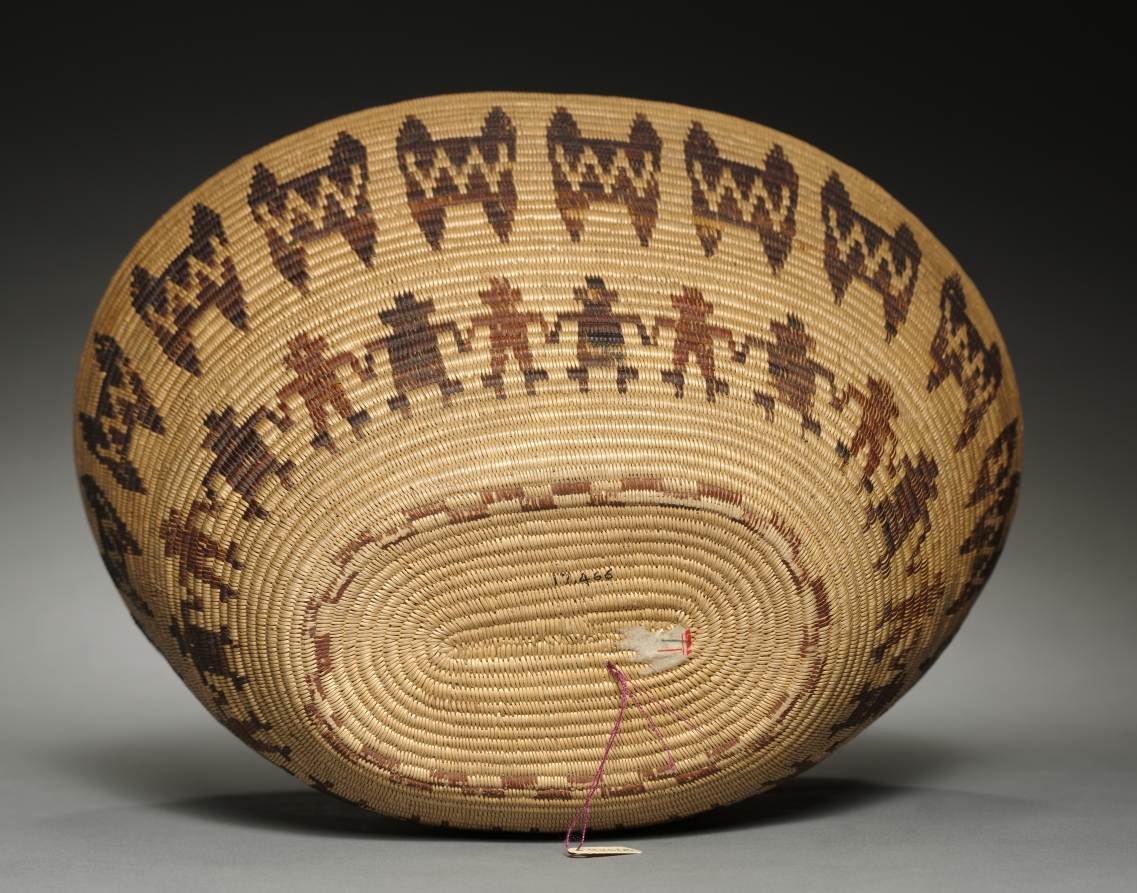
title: Jar-shaped Basket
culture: Native North America, Great Basin, California, Death Valley, Timbisha (Panamint) Shoshone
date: c. 1900–1910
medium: willow, bulrush, yucca root; coiled (3 rods)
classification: Basketry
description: The figures woven in the lower register of this basket were borrowed from basketry of the Yokuts, a California group that lived to the west of Timbisha (Panamint) Shoshone territory.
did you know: The figures woven in the lower register of this basket were borrowed from basketry of the Yokuts.